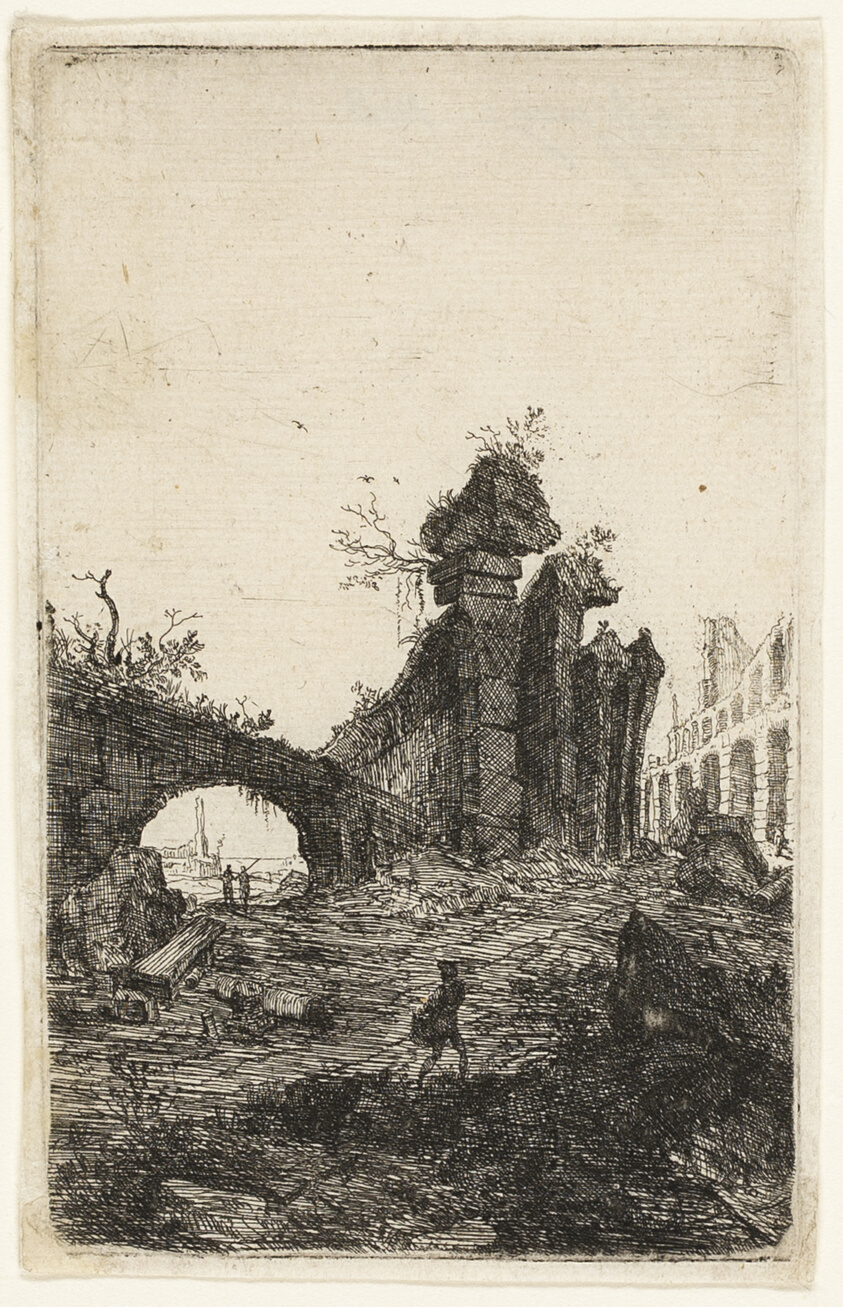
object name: Print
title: Ruins of the Collosseum, plate 10 from The Ruins of Rome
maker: Bartholomeus Breenbergh (Dutch, 1598-1657)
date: 1639/40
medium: Etching in black on ivory laid paper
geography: Holland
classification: etching; print; prints and drawing